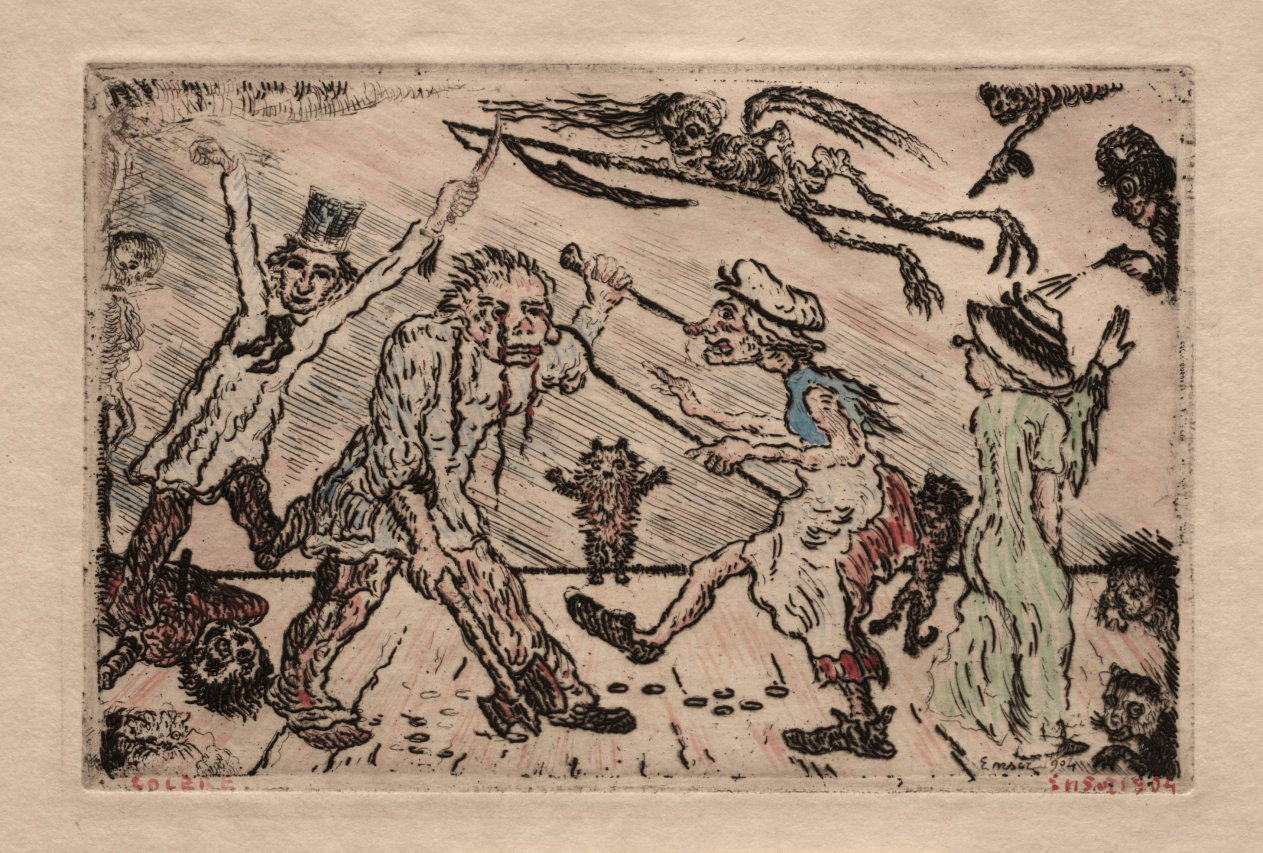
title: The Seven Deadly Sins: Anger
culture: Belgium, 19th-20th Century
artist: James Ensor (Belgian, 1860–1949)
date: 1904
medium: etching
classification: Print